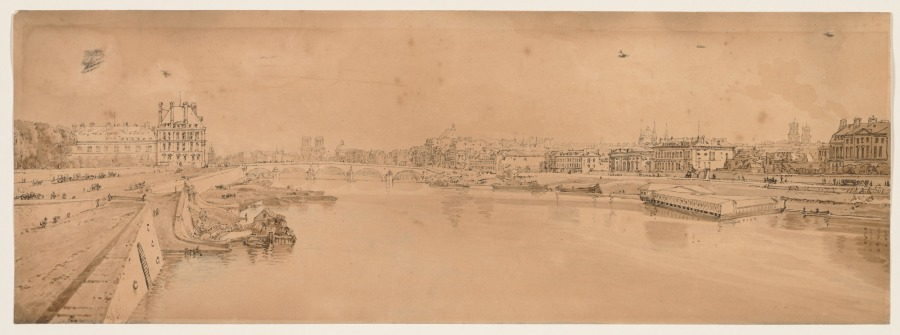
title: A Selection of Twenty of the Most Picturesque Views in Paris: View of the Tuilleries and Bridge and taken from Pont de la Concorde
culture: England, early 19th Century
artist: Thomas Girtin (British, 1775–1802)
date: 1802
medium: soft-ground etching with bistre wash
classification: Print